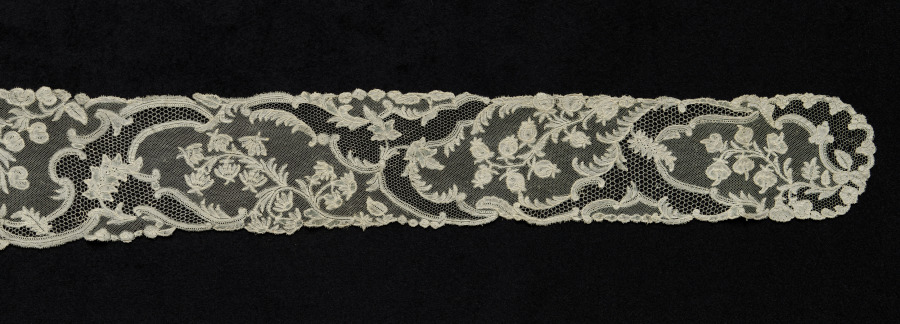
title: Bobbin Lace (Point d'Angleterre) Lappets and Edging for a Cap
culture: Belgium, Brussels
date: 1700s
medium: linen: bobbin lace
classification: Lace